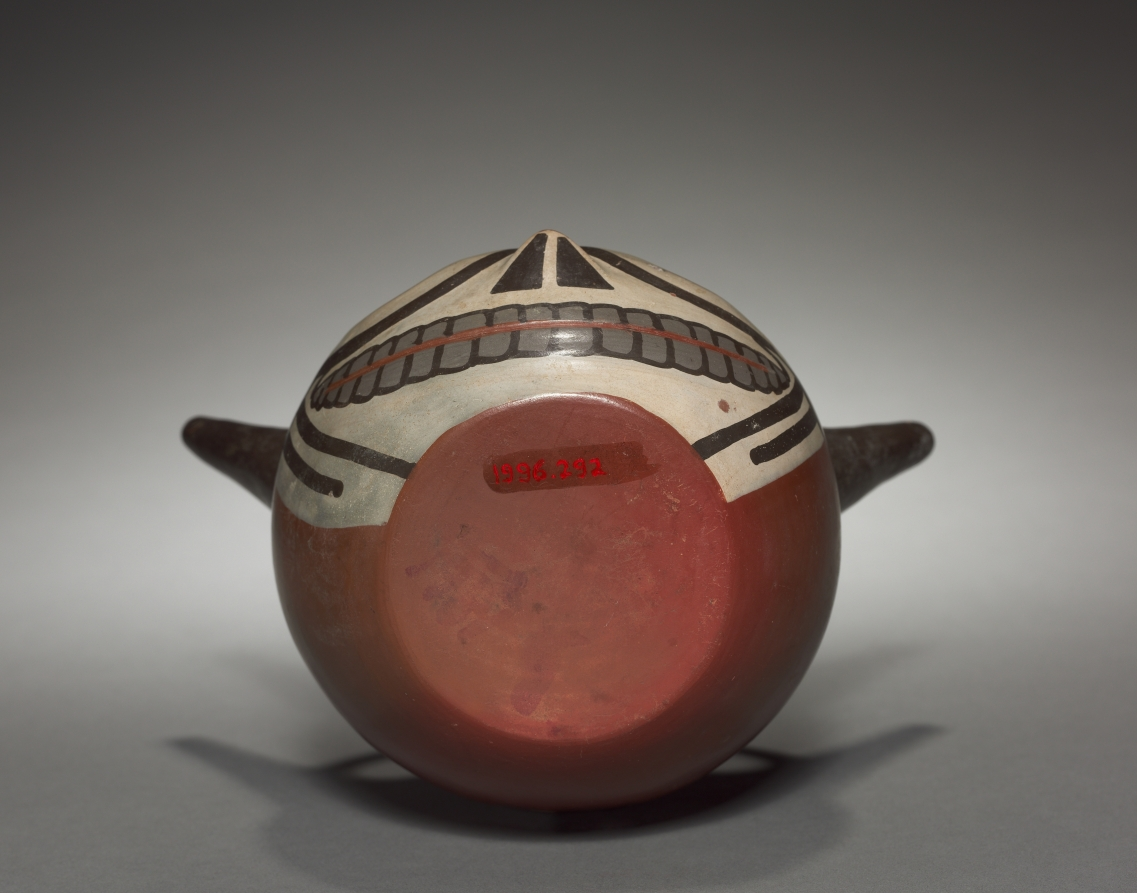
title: Skull Vessel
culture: Wari (Pachacamac) style, Middle Horizon, Epoch 2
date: 500–900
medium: earthenware with colored slips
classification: Ceramic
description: This vessel's clear, vibrant color reveals the inspiration of Wari ceramics in those of the South Coast Nasca. The twin spouts joined by a flat, handle-like bridge are also an old South Coast spout type.